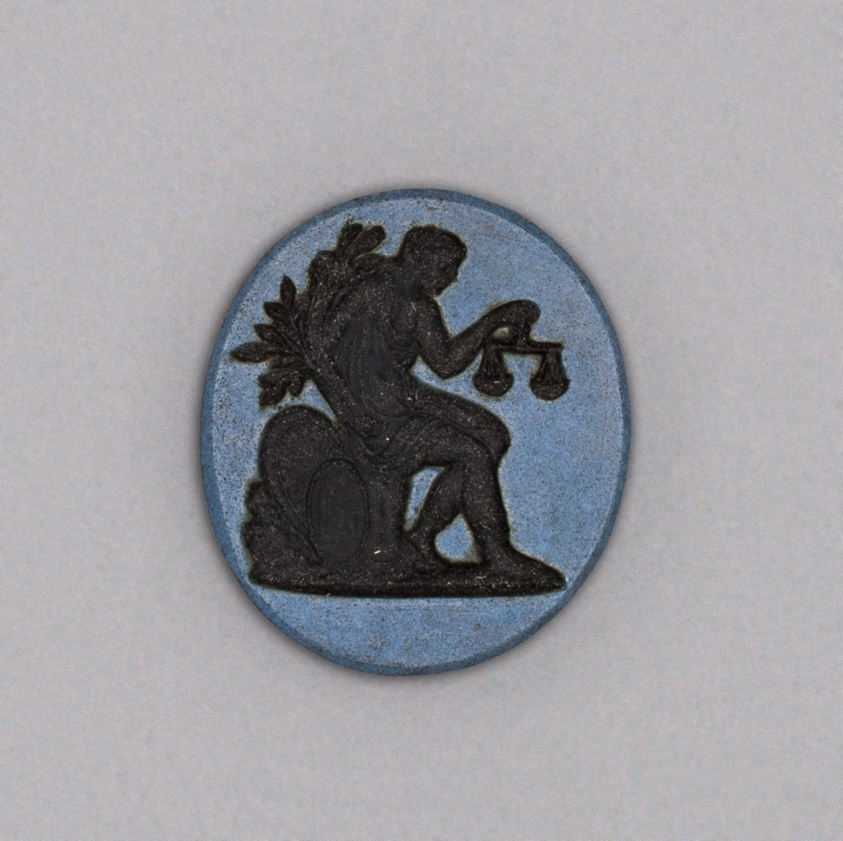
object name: Ceramics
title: Intaglio with Figure of Justice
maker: Wedgwood Manufactory (England, founded 1759)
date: Late 18th century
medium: Stoneware (jasperware)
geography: Burslem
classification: sculpture; stoneware; european decorative arts; ceramics